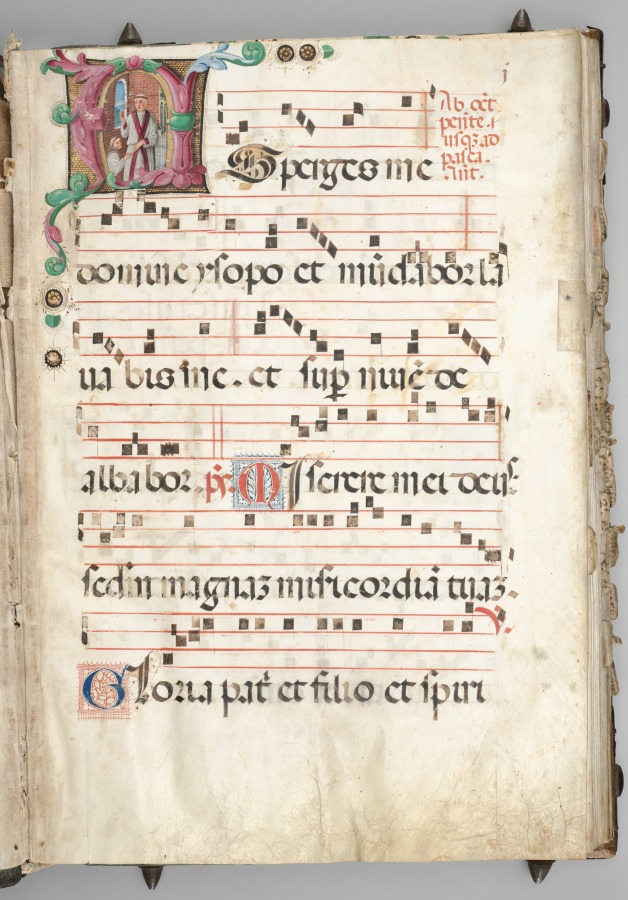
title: Gradual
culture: Italy, Verona(?)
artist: circle of Girolamo dai Libri (Italian, 1474–1555)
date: c. 1520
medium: ink, tempera, and gold on parchment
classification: Manuscript